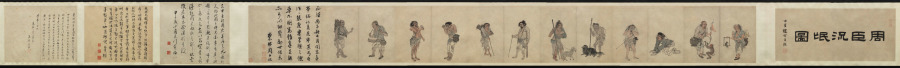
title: Beggars and Street Characters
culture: China, Ming dynasty (1368–1644)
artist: Zhou Chen (Chinese, c. 1450–c. 1536)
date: 1516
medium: Handscroll; ink and light color on paper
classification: Painting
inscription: 題: 周臣流氓圖. 古堇趙鶴琴 [印] 老鶴臨池; 鵝池軒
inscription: 正德丙子秋七月，閒窗無事 ，偶記素見市道丐者種種態度。乘筆硯之便，率爾圖寫。雖無足觀，亦可以助警勵世俗云。 東邨周臣記 [印]東邨; 舜卿; 鵝場散人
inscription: 吳中東邨周君，善丹青，尤長於人物。此圖其所見盛市丐者之狀種種，各盡其態，觀者絕倒。嗟乎，今之晝夜乞哀以求富貴者，安得起周君而貌之耶。臥雲徵君出示，余漫題其後。 甲子歲十月吳門黃姬水 [印] 士雅山人; 另一印不詳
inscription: 是冊凡數種。其飢寒流離疲癃殘疾之狀，種種之異。觀此而不惻然心傷者，非仁人也。計正德丙子逆瑾之流毒已數年。而[江]彬 [錢] 寧輩肆虐方熾。意分符剖竹諸君，亦鮮有能撫字其民者。然則舜卿此作，殆與鄭君 流民圖同意。其有補於治道者不淺，要不可以墨戲忽之也。 長洲張風翼題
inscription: 東村此筆，蓋圖寫飢寒乞丐之態，以警世俗耳。而質山 [黃姬水]欲其寫昏夜乞哀，而靈墟[張鳳翼]則擬之於安上門圖。二君之見，其各有所指哉。昔唐六如每見周筆，輒稱曰：周先生！蓋深服其神妙之不可及。若此冊者，信非他人可能而有符於六如之心伏矣。豈易得耶。若黃、張之指，則又論於畫之外，不在於形似筆墨之旨也。 萬歷丁丑十二月三日 茂苑文嘉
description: Zhou Chen from Suzhou provides rare depictions of impoverished people that once filled the city’s markets and streets. Despite Suzhou’s prosperity, its rapid growth polarized society, including the wealthy and those who had deserted their farmlands, who were without homes, unemployed, or sick. Amid these are figures who inspire fear rather than empathy. The painting may thus be informed by local practices at the end of the lunar year, in which street beggars, in exchange for food or money, would dress up like ghosts and demons to drive out evil forces.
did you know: Although Zhou Chen's original composition was an album of 24 figures, today it is mounted as two handscrolls, one in the Cleveland collection and one in the Honolulu Museum of Art.